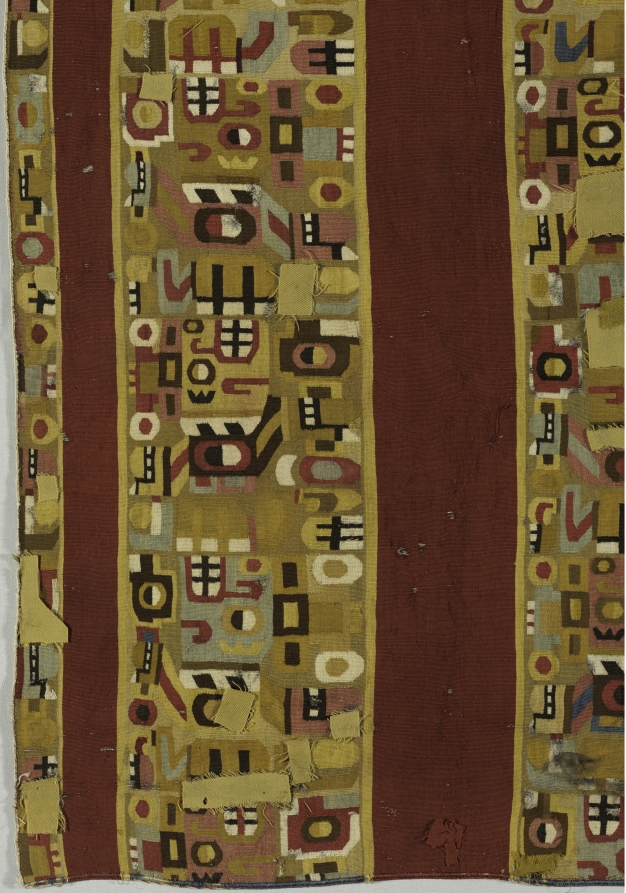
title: Tunic with Sacrificer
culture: South America, Peru, Central Andes, Middle Horizon, Wari people, 7th-11th century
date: 600–1000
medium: camelid-fiber, cotton; tapestry weave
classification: Textile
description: An extremely abstract supernatural sacrifice repeats in different colors and orientations across the body of this tunic, which was shortened on one side in antiquity. Look for the toothy black-and-white mouth in the sacrificer's upward-gazing head; other facial features include a button nose and a vertically divided eye. The figure holds the L-shaped haft of an axe behind its back and, at the front of its body, a short staff with a severed, upside-down human head on the top.